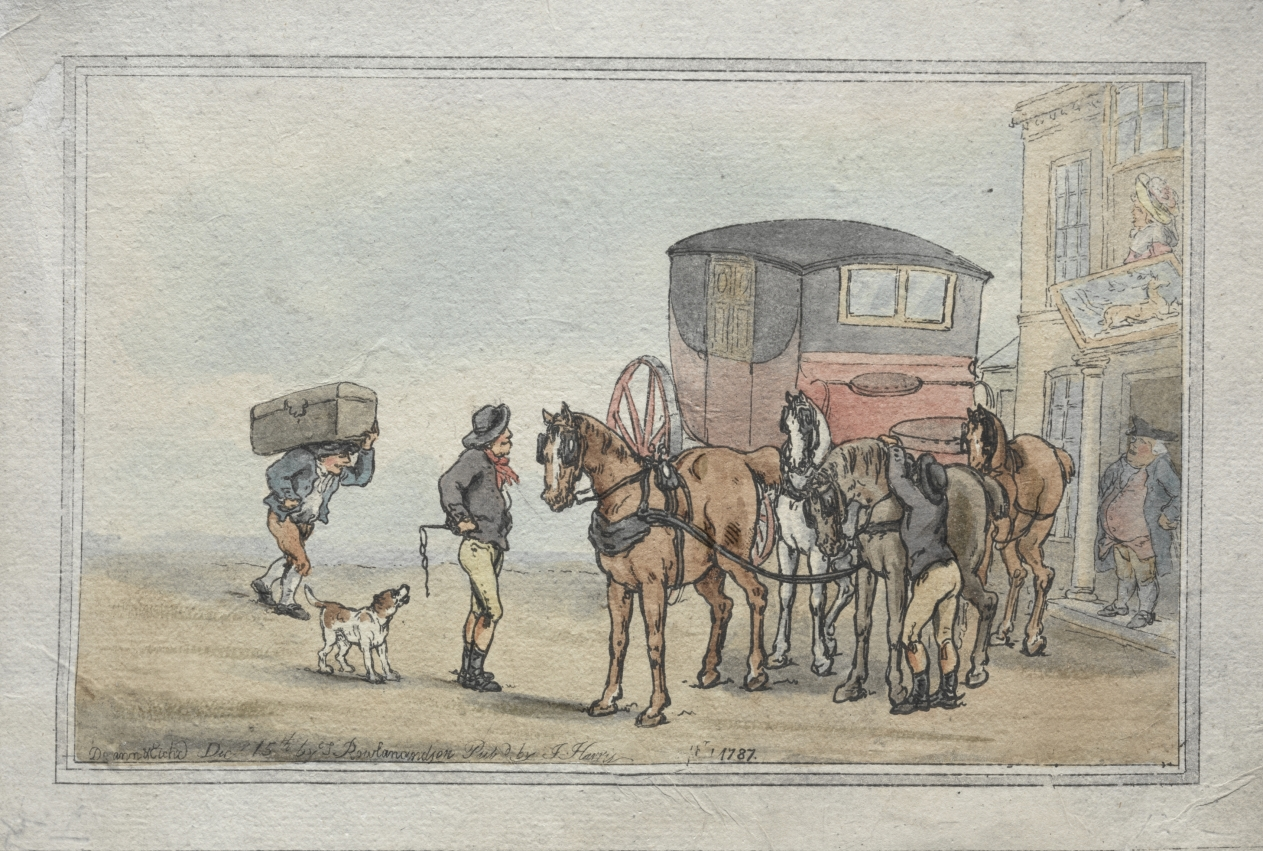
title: Postboys and Posthorses at the White Hart Inn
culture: England, 18th century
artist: Thomas Rowlandson (British, 1756–1827)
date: 1787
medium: etching, hand colored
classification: Print